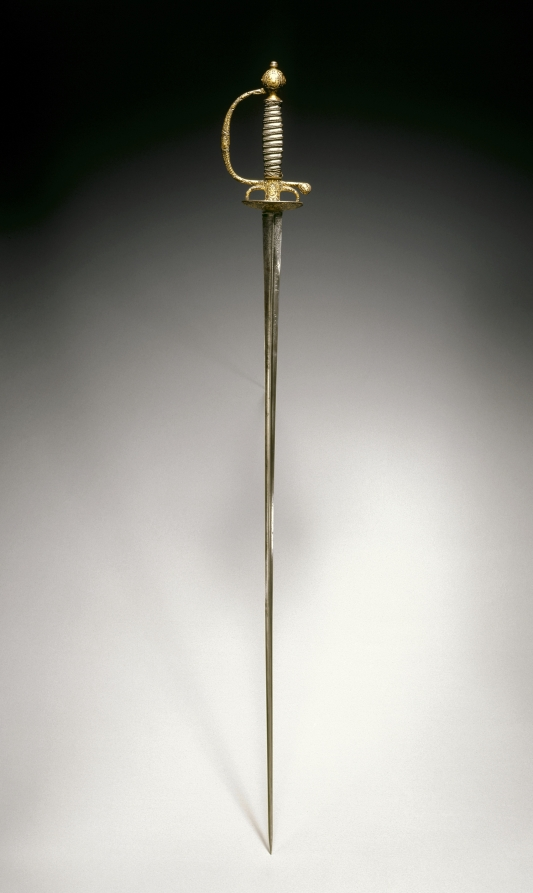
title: Smallsword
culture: France, Paris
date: c. 1730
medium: steel, blued, with gold encrusted decoration; chased and engraved; silver wire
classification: Arms and Armor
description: During the 1700s, the small-sword emerged as a light, quick weapon. Like the rapier it was carried by unarmored civilians, the noblemen of the upper classes. Over time this delicate sword became more an accessory of male attire than a weapon essential to life and death. The sword hilt, which shows even when the blade is sheathed, became the ground for elaborate decoration. These small swords thus represent the final stage in the evolution of the sword, from the edged weapons of antiquity to the elegantly refined blades of the 1700s and 1800s.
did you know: The decorative design of the hilt was often carried down onto the blade, which could be chased or etched with designs, and gilded or blued as seen here.